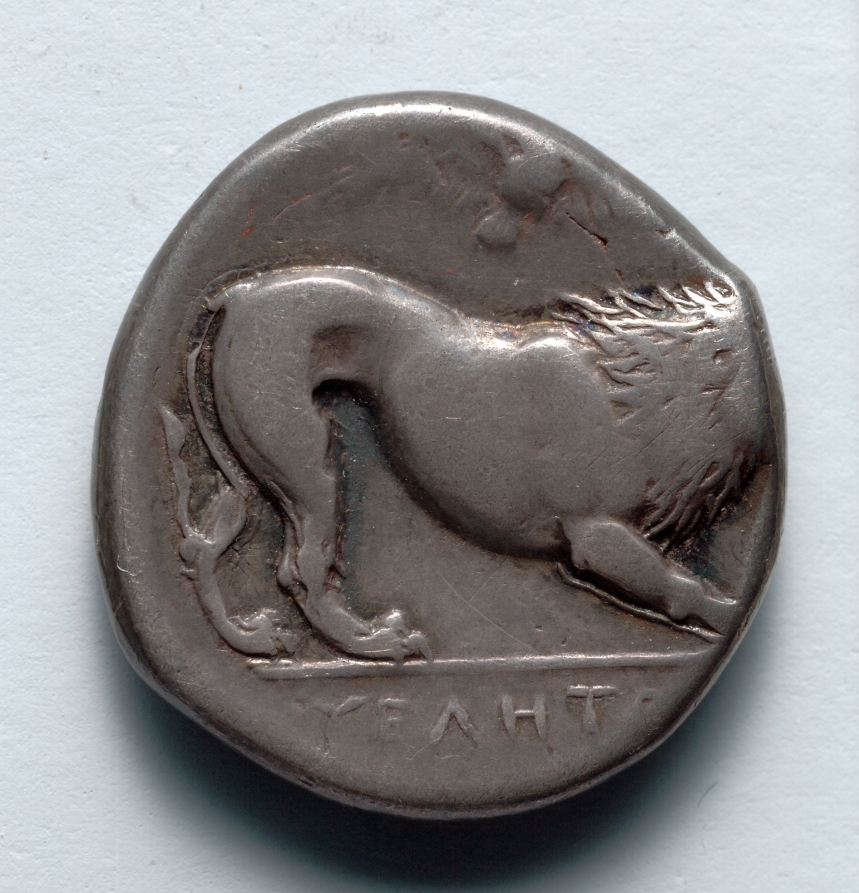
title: Stater: Lion, owl (reverse)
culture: Greek, minted at Hyele (South Italy)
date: c. 340–334 BC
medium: silver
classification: Coins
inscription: ΥΕΛΗΤ[ΟΝ]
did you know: Nearly worn away above the lion are the remains of a flying owl.